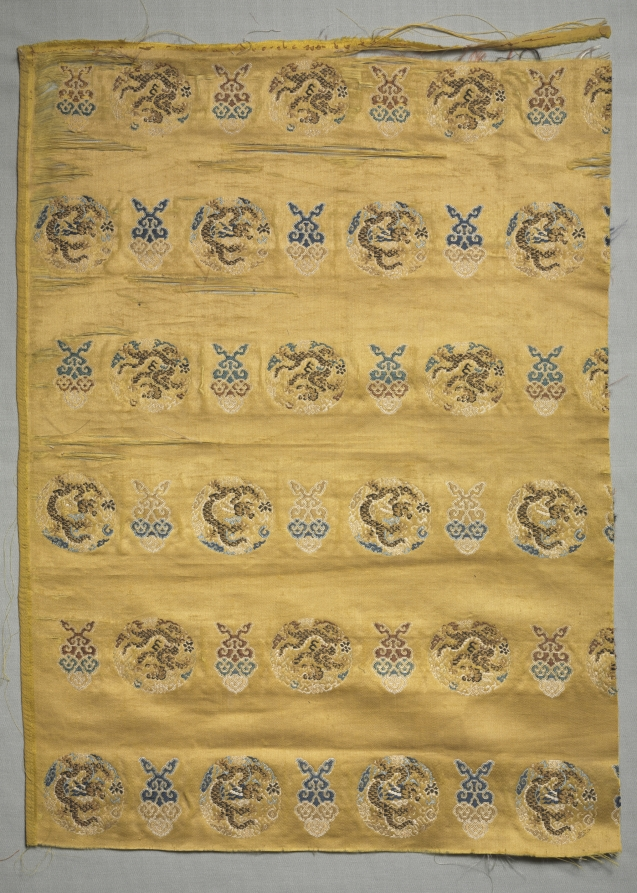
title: Fragment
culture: China, Qing dynasty (1644-1911)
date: 1700–1720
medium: silk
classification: Textile